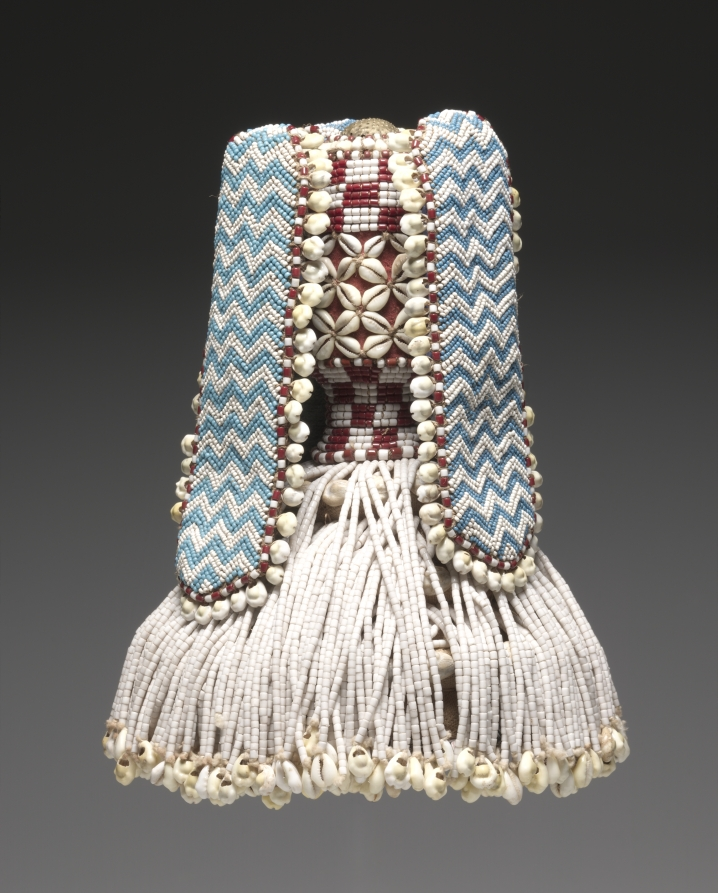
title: Hat (Kalyeem)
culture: Africa, Central Africa, Democratic Republic of the Congo, Kuba-style maker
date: possibly early 1900s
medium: Raffia, glass beads, cowrie shells, cloth (including wool), thread, and copper alloy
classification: Garment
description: Kuba men (and some women) show their title and status with hats and hat accessories. The male owner of this heavily beaded and shell-covered hat (kalyeem) had a senior title. A simple coiled basketry hat forms its foundation (similar to 1915.465). Fabric panels stitched with zig-zagging white and blue beads edged in cowries hang from the top. White bead strands with cowrie shells flow downward, pushed out over the forehead by a large brim. Technically and aesthetically, beaded Kuba hats and masks have much in common; artists specializing in beading techniques had the skills to make both, using imported beads and shells.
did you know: The imported beads and shells on this hat were expensive, so they showed off its wearers' wealth.